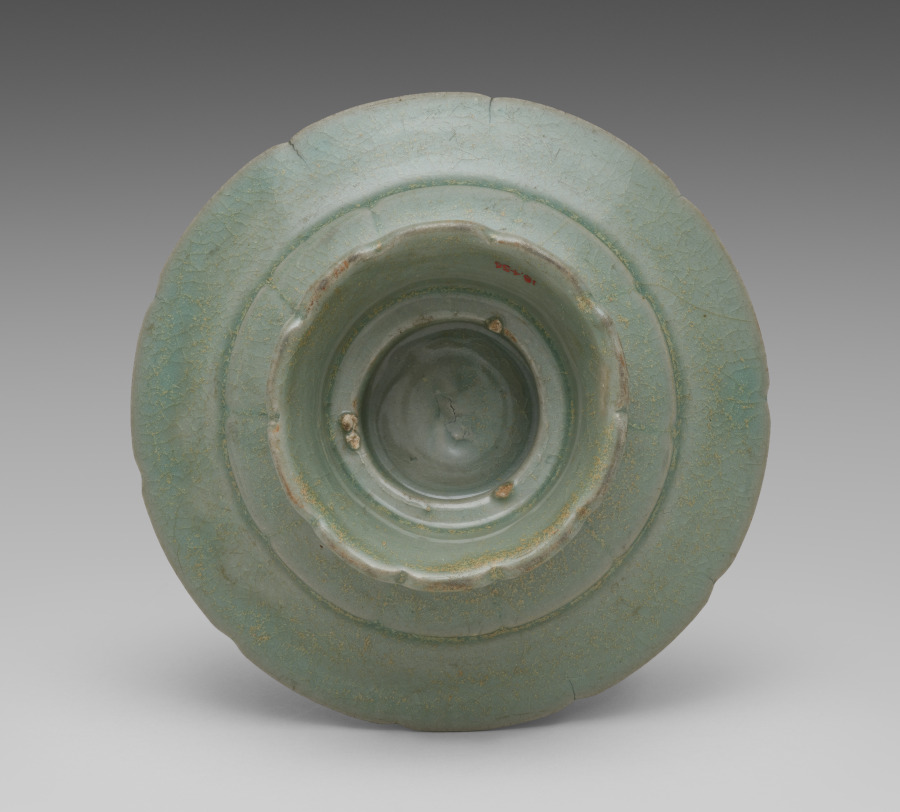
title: Floral-shaped Cup Stand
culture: Korea, Goryeo dynasty (918–1392)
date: 1200s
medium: pottery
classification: Ceramic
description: As early as the seventh century, the practice of drinking tea became an important part of elite culture in Korea. In enjoying teas, elites commissioned a variety of types of utensils and vessels including this delicate-looking cup stand, not only to make their tea-drinking experience more exciting, but also to show their refined taste.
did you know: Elites of the Goryeo period are known for their love of drinking tea and wine. This type of delicate-looking cup stands not only made their drinking experience more enjoyable, but also showed their refined taste.